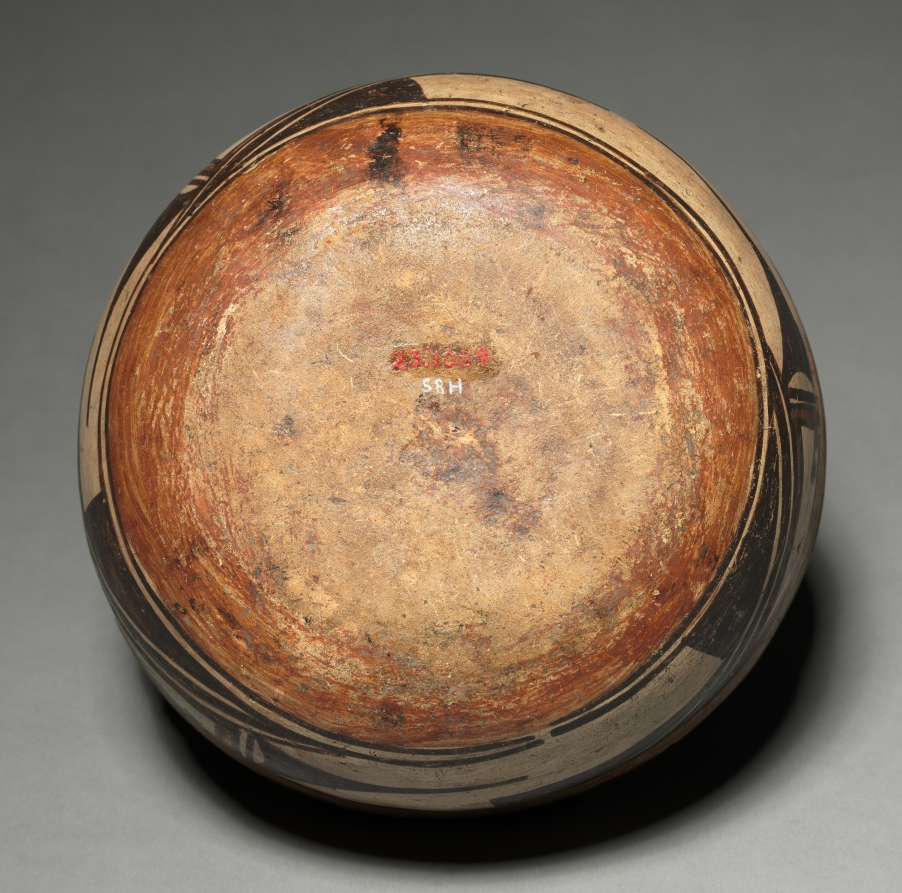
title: Stew Bowl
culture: Southwest,Pueblo, Hopi, Post-Contact Period, 20th century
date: 1870– 1880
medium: ceramic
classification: Ceramic